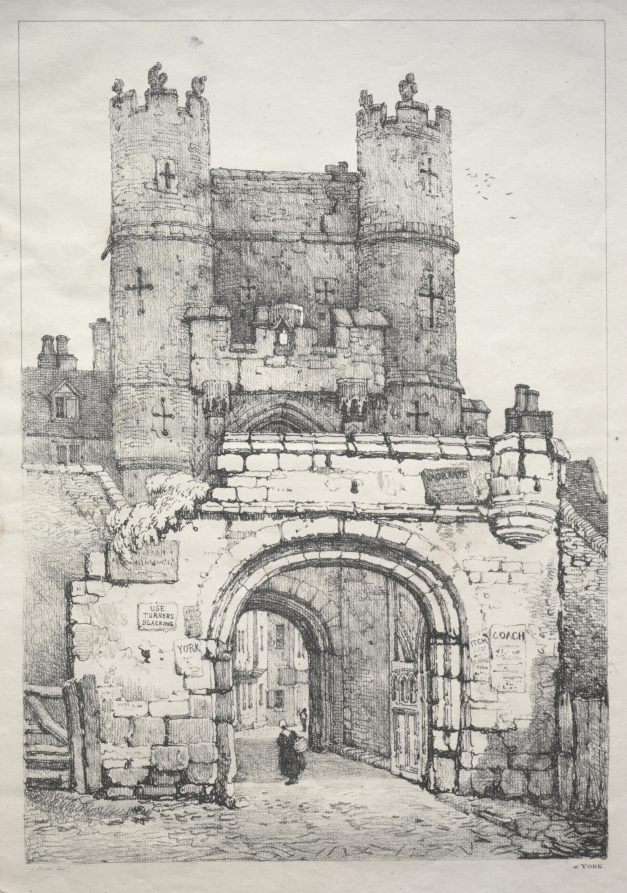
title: A Series of Ancient Buildings and Rural Cottages in the North of England: At York, Medieval Gate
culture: England, 19th century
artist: Samuel Prout (British, 1783–1852)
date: 1821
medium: softground etching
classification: Print